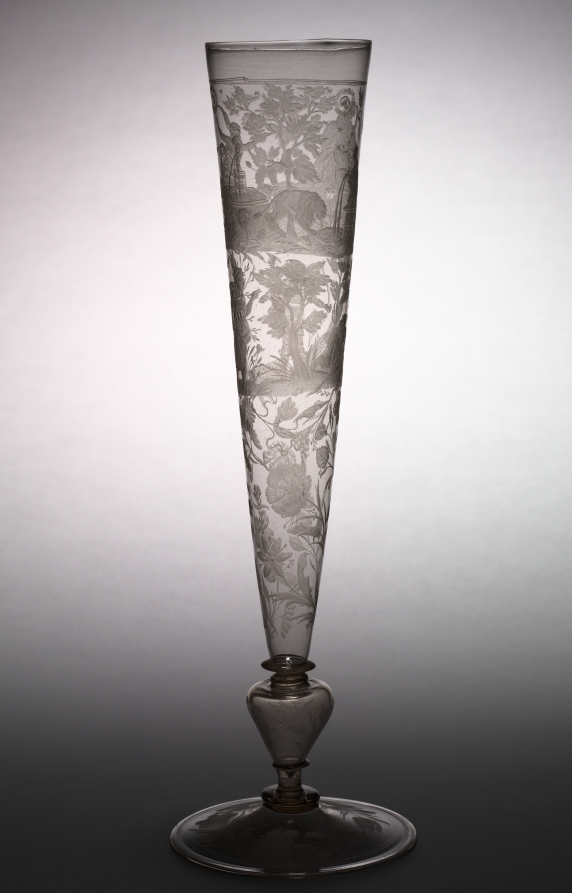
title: Flute Glass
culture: Germany, Thuringia, early 17th century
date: early 1600s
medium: glass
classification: Glass